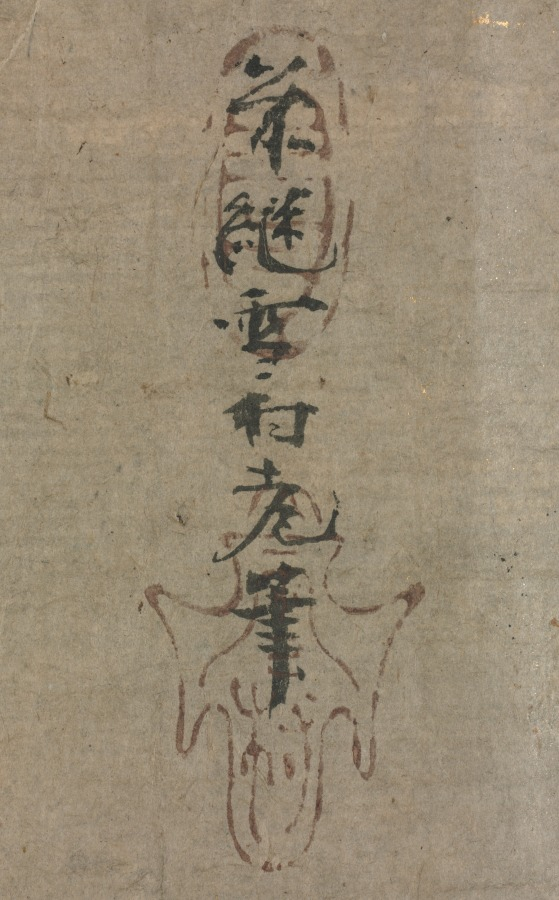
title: Eight Views of Xiao-Xiang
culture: Japan, Muromachi period (1392–1573)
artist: Sesson Shūkei (Japanese, c. 1492–c. 1577)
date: 1500s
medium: handscroll; ink on paper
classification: Painting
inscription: Signature and seal of artist at end of painting.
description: Eight Views of the Xiao and Xiang Rivers can be traced to 11th-century Chinese poems and paintings, the depiction of which had also become popular among Korean and Japanese painters. Xiao-Xiang refers to the region in present-day Hunan province where the Xiao and Xiang rivers converge. Few painters of the Eight Views had in fact seen the scenery; rather, they were trying to portray in ink and wash the lyrical qualities of dim light and a misty atmosphere typical of that region. Each of the poetic titles suggests a time of day, a season, or specific atmospheric conditions—subjects that challenged the abilities of the most talented artists. In this miniature painting (shukuzu) of the Muromachi period, Japanese Zen monk and painter Shukei Sesson depicted all eight views featured in Chinese prototypes: Wild Geese Descending to Sandbar; Returning Sails Off a Distant Coast; Mountain Market in Clearing Mist; River and Sky in Evening Snow; Autumn Moon over Dongting Lake; Night Rain on the Xiao and Xiang; Evening Bell from Mist-Shrouded Temple; and Fishing Village in Evening Glow.